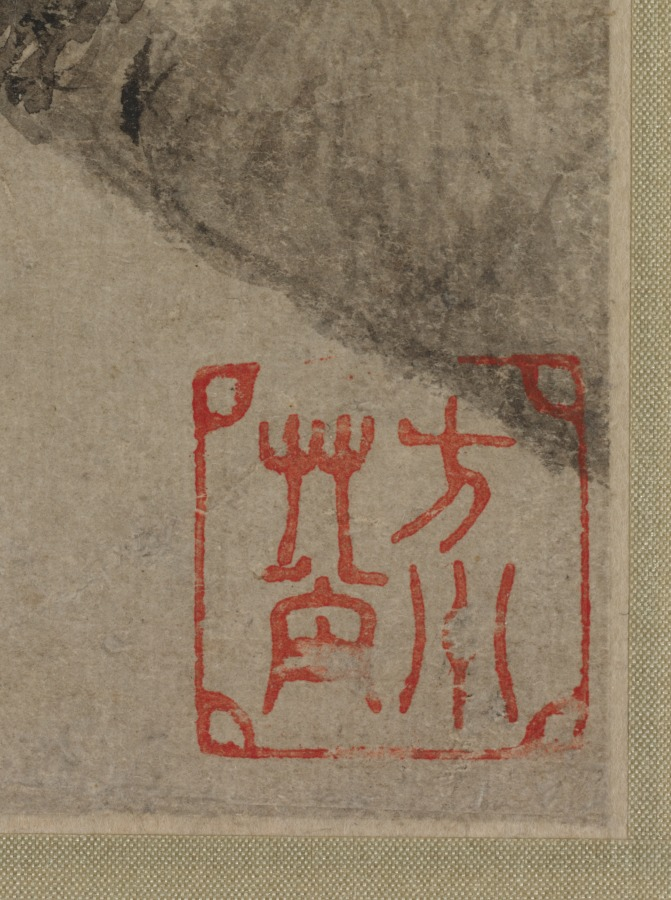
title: Empty Arbor and Rapid Waterfall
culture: China, Ming dynasty (1368–1644)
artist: Zhang Ning (Chinese, 1426-c. 1495)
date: 1468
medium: hanging scroll, ink and color on paper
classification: Painting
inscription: Artist's inscription, signature, and 2 seals: Painted in the summer, the fifth month of the wu-tzu year, the fourth year of the Ch'eng-hua era [1468]. Empty Arbor and Rapid Waterfall. Fang-chou, Chang Ning [seals] Ching-chih; Fang-chou ts'ao-t'ang. 2 additional seals: 1 of Ch'eng Ch'i; 1 unidentified.